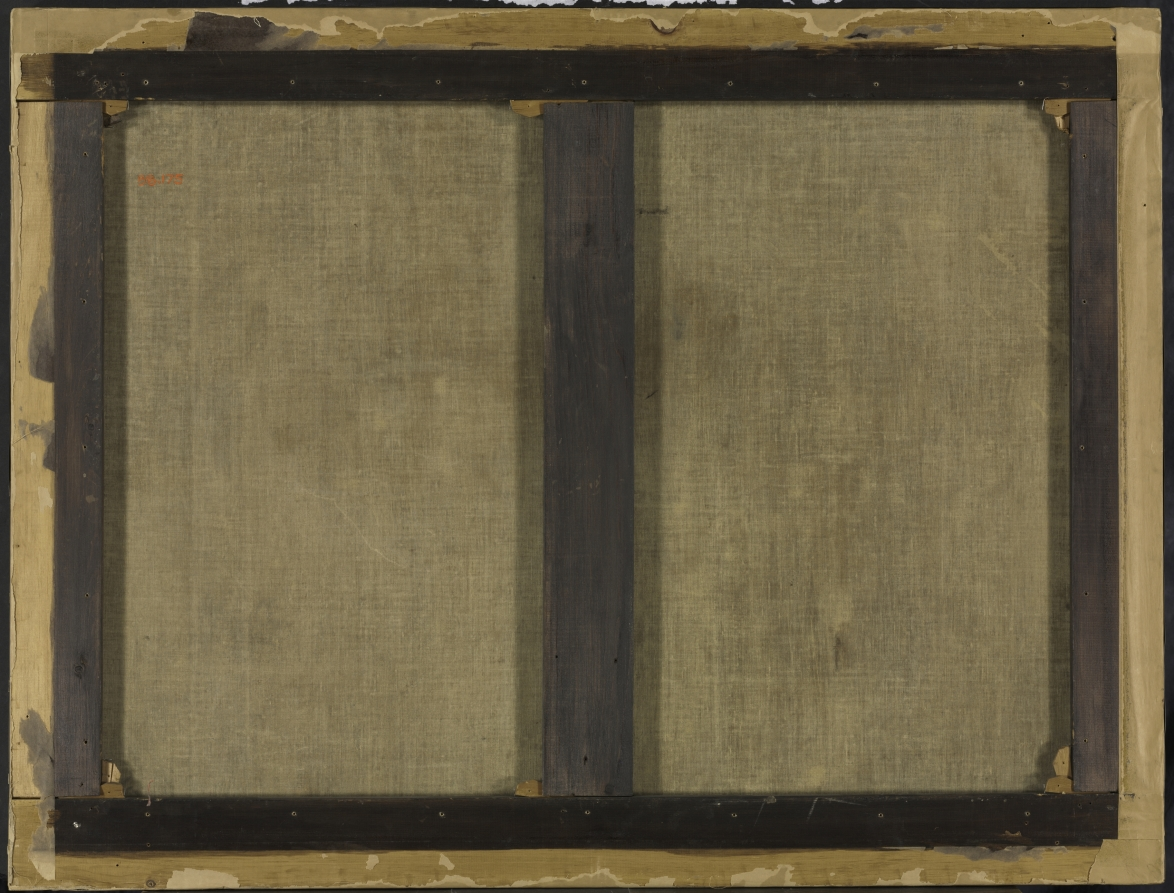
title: Vintage Scene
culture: France, 17th century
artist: circle of Le Nain (French)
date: 1650s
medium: oil on canvas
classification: Painting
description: The mid-17th century saw revived interest in representations of the lower classes. Artists like the Le Nain brothers in France painted scenes that looked back to the Renaissance tradition of pastoral imagery. The Le Nain often depicted ordinary country folk going about their daily business, subjects and figures they remembered from their childhood in rural Laon. Considered a companion piece to Peasant Children Dancing (1958.175.2), Vintage Scene has also been attributed to the Master of the Béguins, a Flemish artist who worked in the manner of the Le Nain in Paris. Here, good-natured though bawdy men drink in the background shade, while a sweet-faced young woman in the center surrounded by chubby children flashes the viewer a coy smile that reveals her awareness of the slowly creeping hand of her drunk companion. While peasants drinking was a popular subject among Flemish artists, the theme of wine connects the subject with the grape harvest, which recalls the Le Nain's agricultural homeland in France. This use of both aesthetic and biographical aspects of the Le Nain's lives demonstrates the Master of Béguins's ability to absorb the stylistic and thematic lessons of the famous brothers.